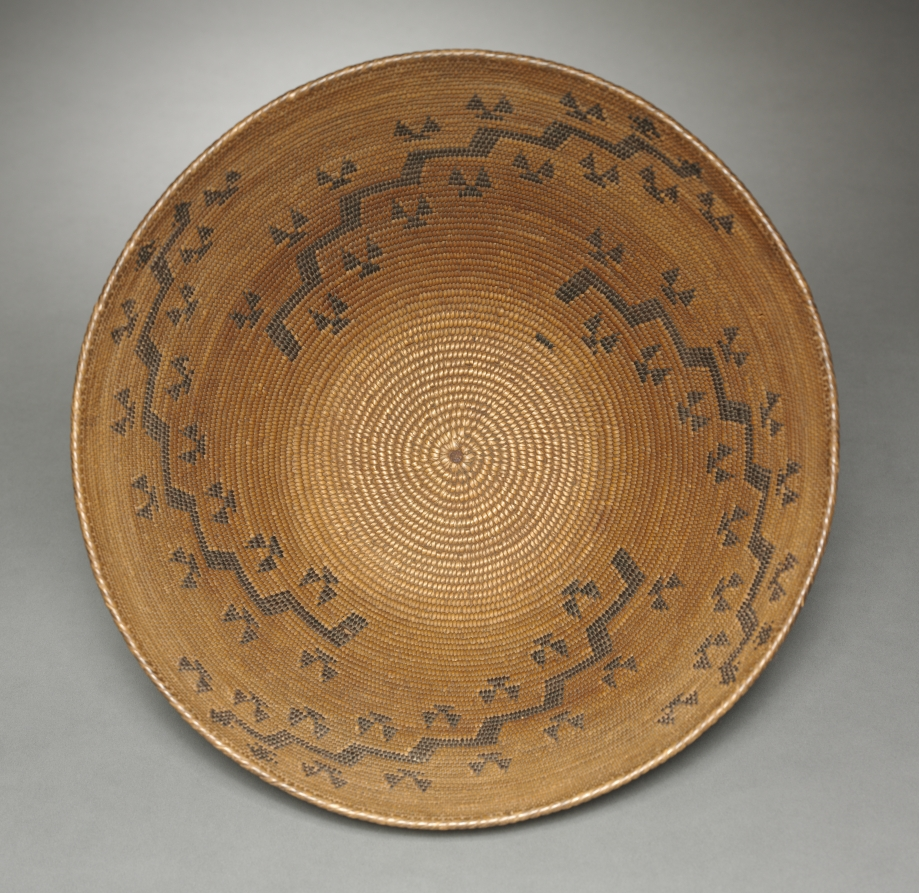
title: Cooking Bowl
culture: California, Mono, Lake Paiute, late 1800s–early 1900s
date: 1890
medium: willow, bracken fern; coiled (3 rods)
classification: Basketry